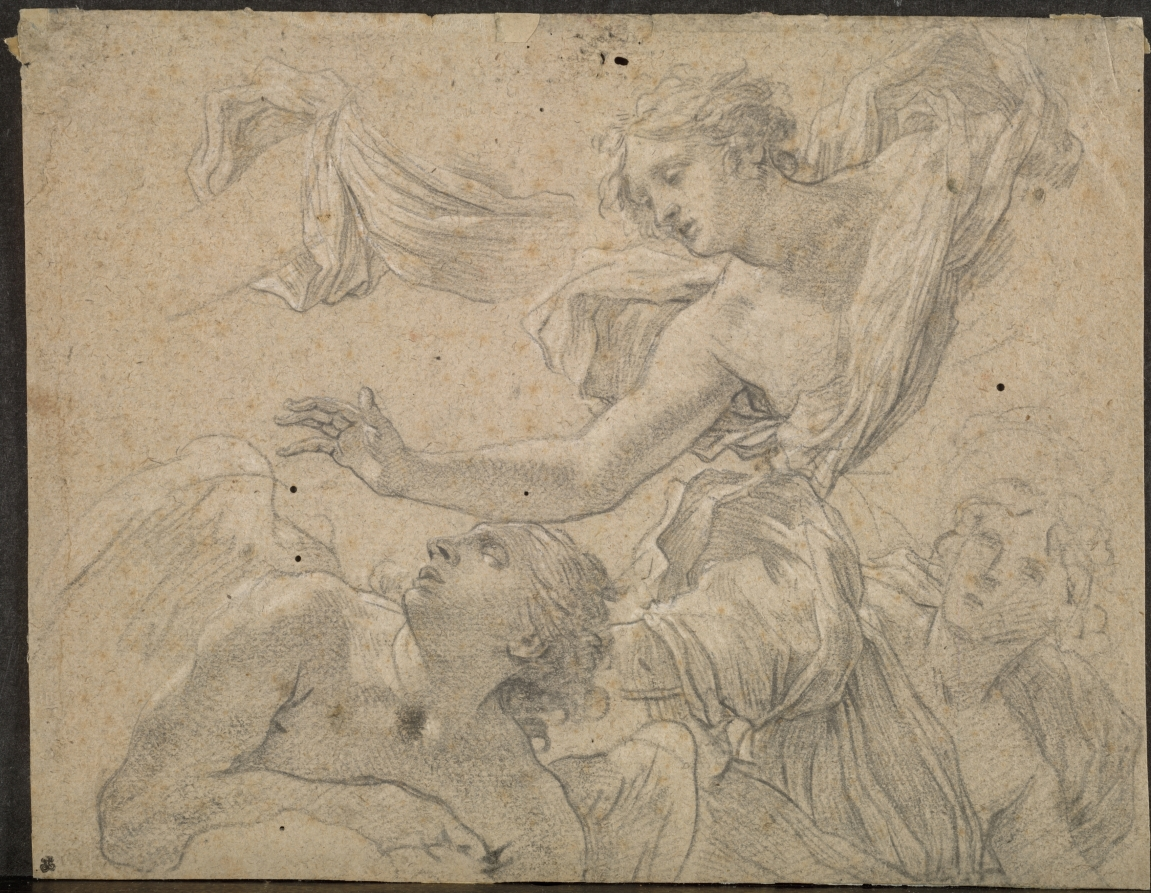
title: Studies of Angels (recto); Panthea before Cyrus? (verso)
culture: France, 17th century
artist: Michel Dorigny (French, 1617–1665)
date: 1655–60?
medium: black chalk heightened with white chalk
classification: Drawing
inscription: verso, lower left, in graphite: 225911 [sideways]; lower left, in graphite: 302 [underlined] / 1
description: Dorigny was the collaborator and son-in-law of Simon Vouet, the leading painter working in Paris in the mid-1600s. Their drawing styles are similar, and this sheet was once attributed to Vouet. However, the airy, floating drapery, firm contour lines, and regular parallel hatching lines are all typical of Dorigny's technique in black chalk. Although we do not know of a painting to which this drawing relates, the flying angels indicate that Dorigny had a religious subject in mind when he drew them.